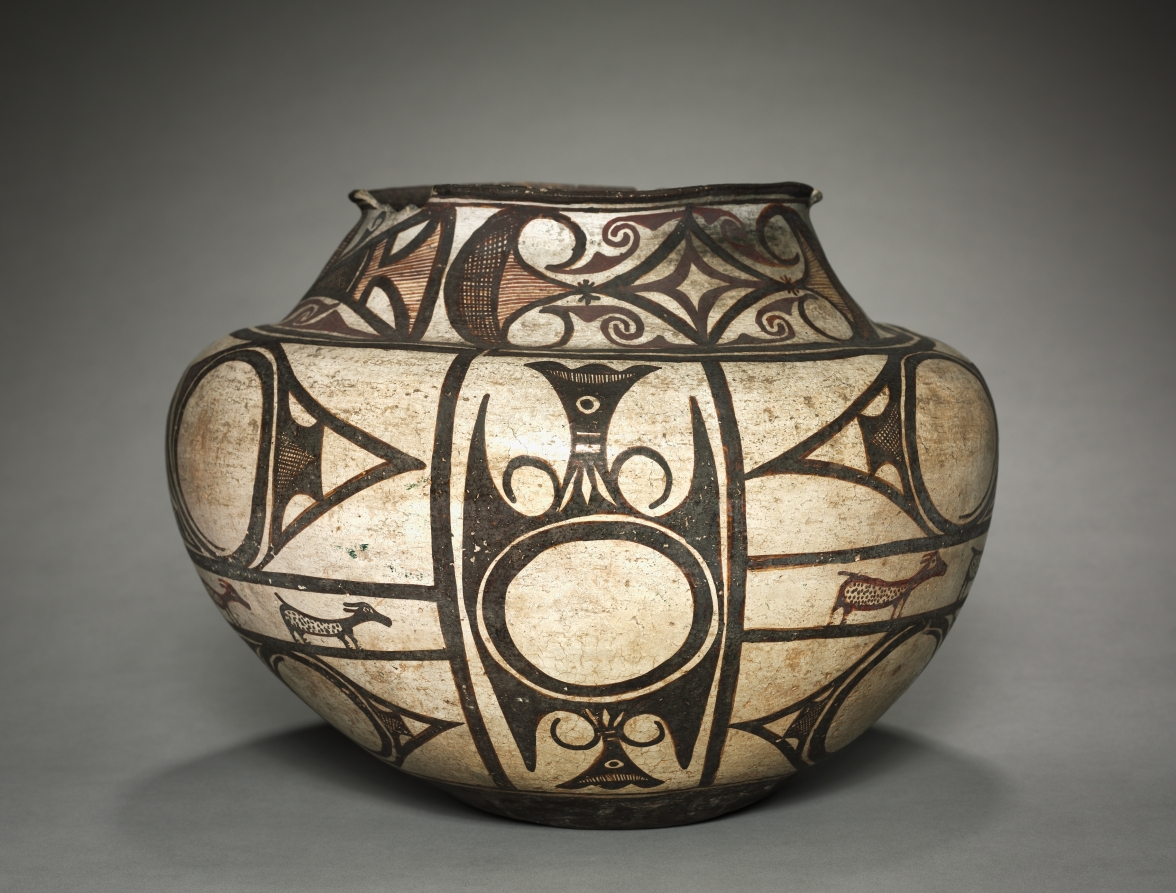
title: Water Jar (Olla)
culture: Southwest,Pueblo, Zuni, Post-Contact Period, late 19th century - early 20th century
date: 1880–1900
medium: ceramic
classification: Ceramic